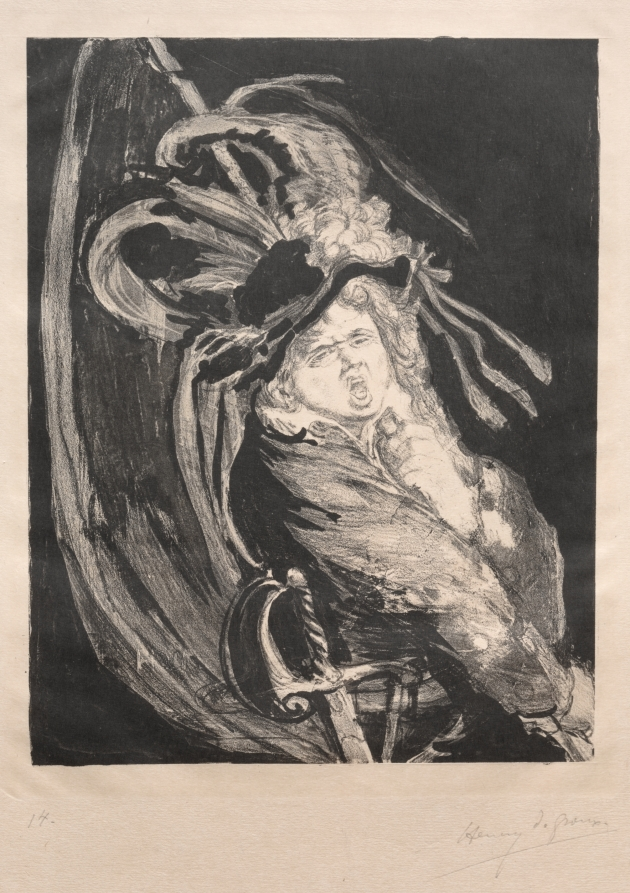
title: Standard Bearer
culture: Belgium, 19th century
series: Published in L'Estampe Originale, Album IV, 1893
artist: Henri de Groux (Belgian, 1867–1930)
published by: Andre Marty (French, b. 1857)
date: 1893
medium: lithograph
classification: Print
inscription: lower right, in graphite: Henri De Groux; lower left margin, in graphitel: 14